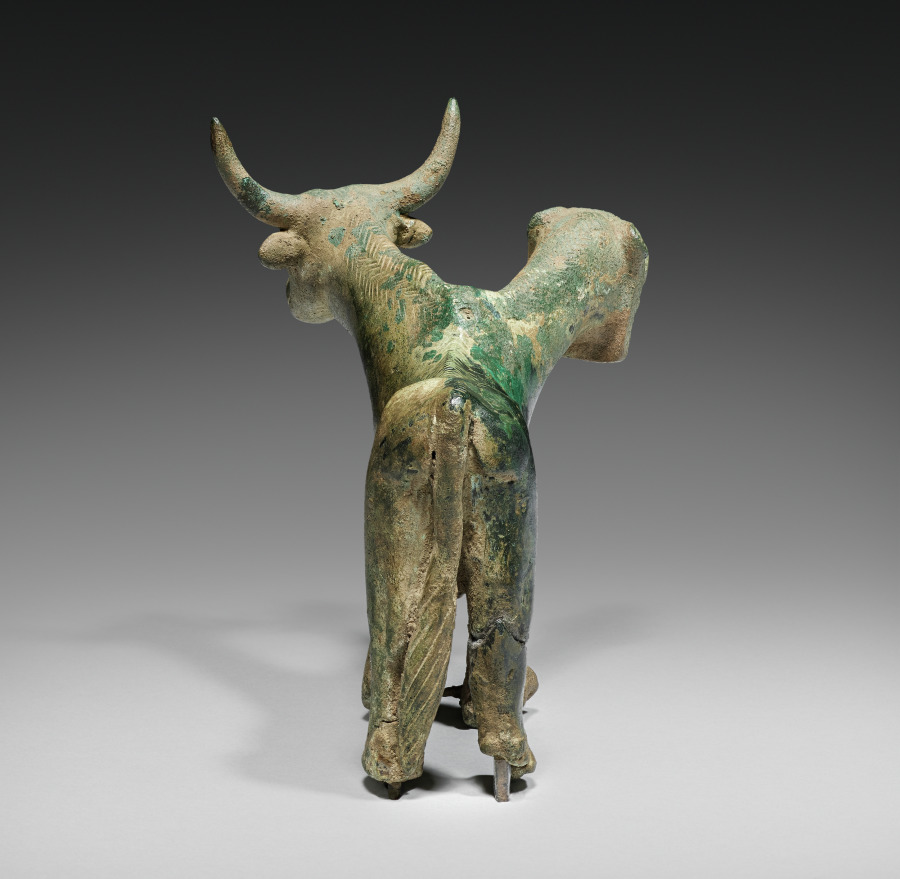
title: Composite Lion and Bull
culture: Iran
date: 1500–1000 BCE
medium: bronze, cast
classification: Sculpture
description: Combining the strength of the lion and the fertility of the bull, this creature must have served as an object of worship in a temple or shrine.